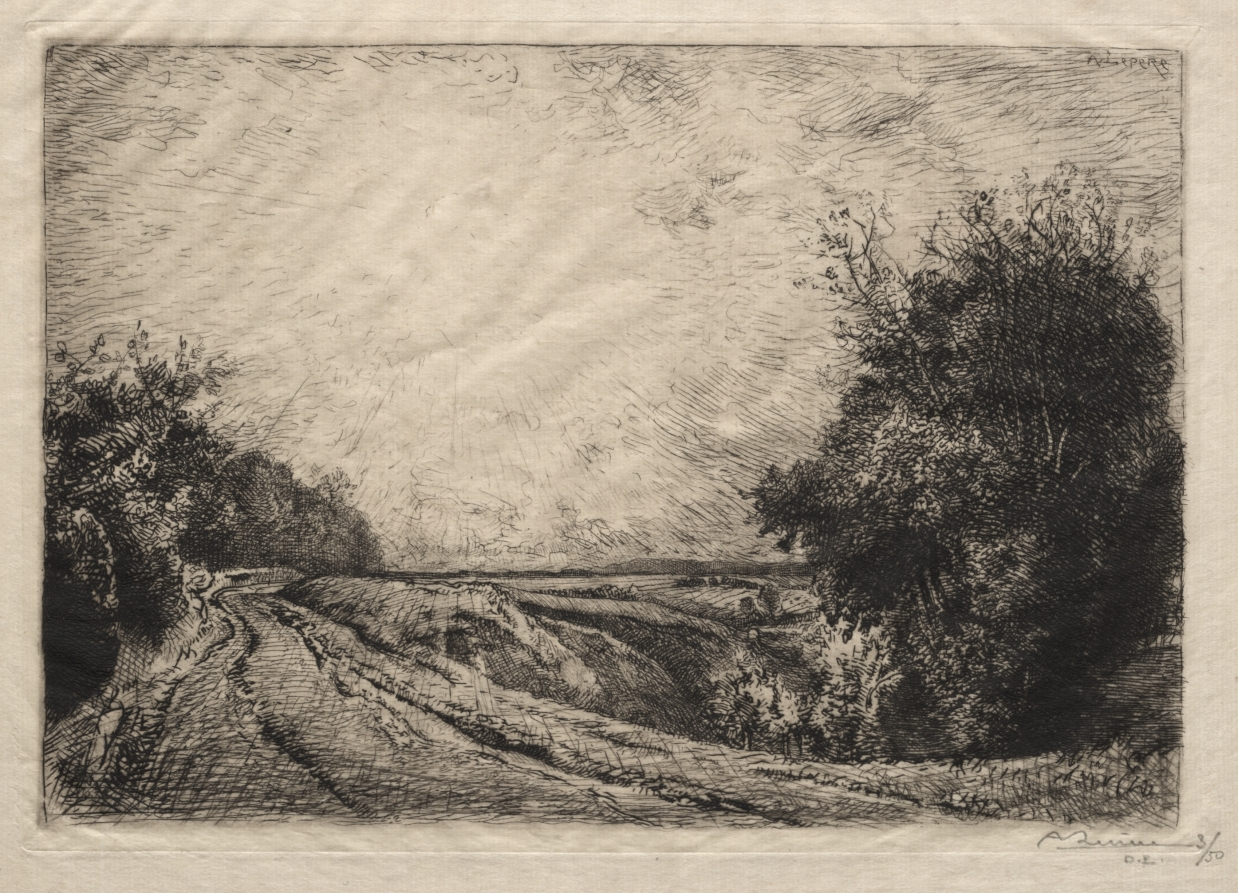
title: La Route de la Houssoye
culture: France, 20th century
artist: Auguste Louis Lepère (French, 1849–1918)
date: 1913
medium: etching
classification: Print